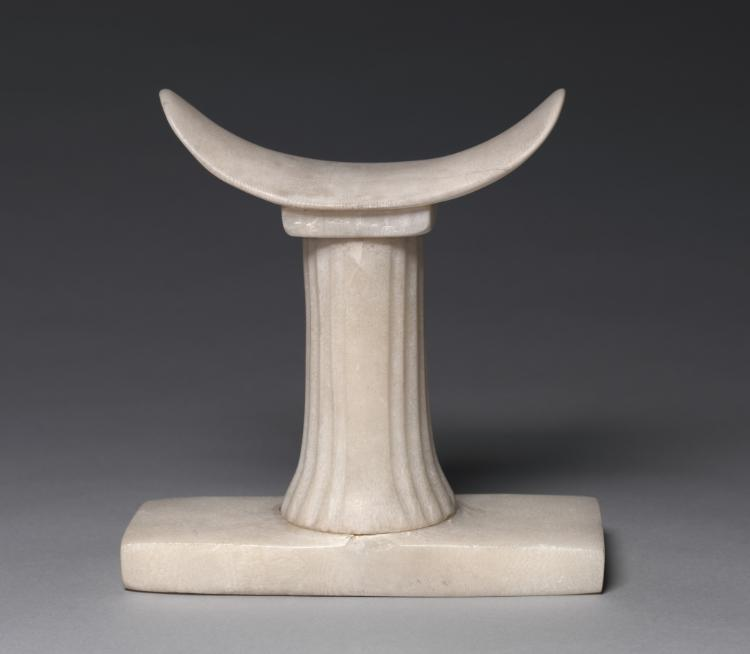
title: Headrest of Irut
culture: Egypt, Old Kingdom (2647–2124 BCE), Dynasties 5–6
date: c. 2454–2140 BCE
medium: travertine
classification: Funerary Equipment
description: The ancient Egyptians used wooden headrests as pillows. Stone headrests were replicas made for the tomb. This example is inscribed on the top of the supporting column for "the king’s noblewoman, Irut."